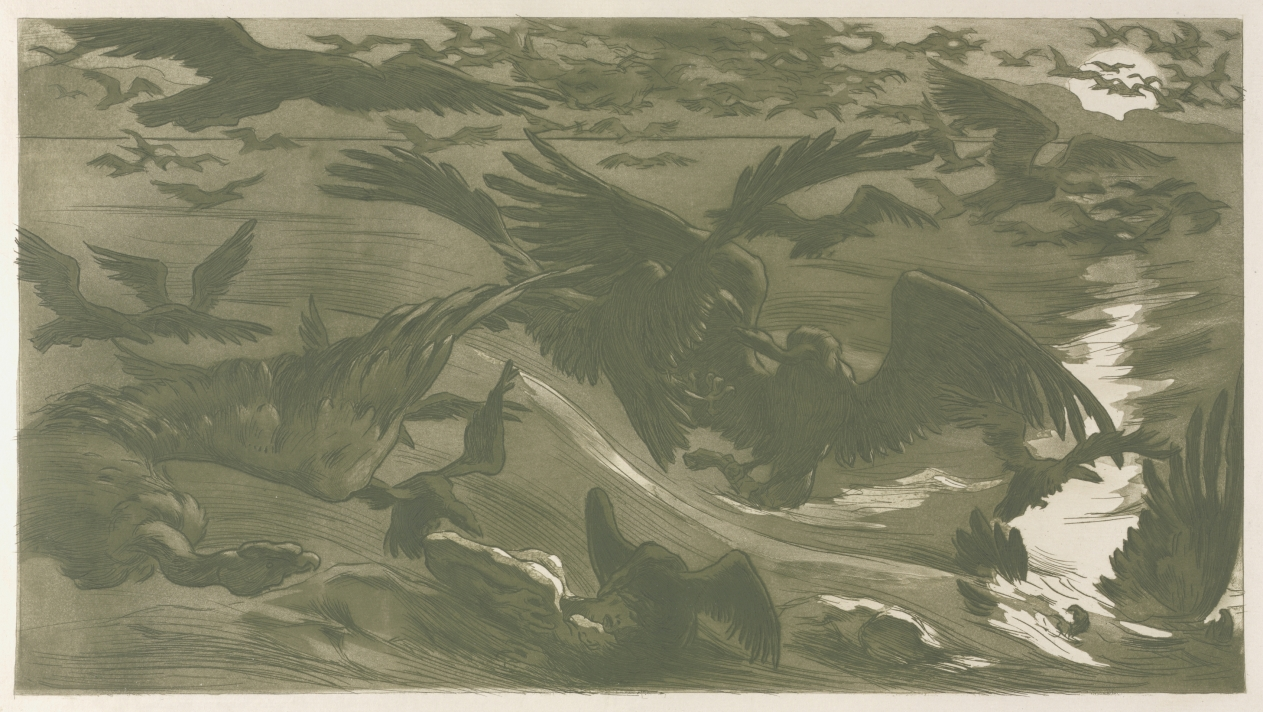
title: Birds of Prey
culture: France, 19th century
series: published in L'Estampe Originale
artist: Victor Emile Prouvé (French, 1858–1943)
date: 1893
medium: aquatint and etching in green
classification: Print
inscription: lower right, in pencil: "V. Prouvé nº.79"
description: In order to exhibit as much as possible in his home, Bonebrake removed the doors from closets to create mini-galleries. One of these, which he dubbed the “chamber of horrors, was reserved for works that might cause fright or apprehension. Birds of Prey, which depicts avians clutching human body parts, would have been hung there. It was published in L’Estampe Originale (The Original Print), the greatest of the late-19th-century print publications.